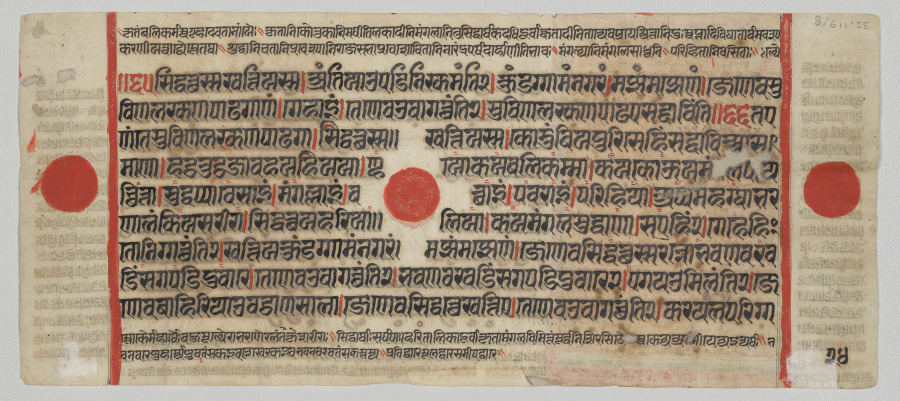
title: Text, folio 24 (verso), from a Kalpa-sutra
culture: Western India, Gujarat, last quarter of the 15th century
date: c. 1475–1500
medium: Gum tempera, ink, and gold on paper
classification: Painting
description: King Siddhartha is depicted on this page with his wife, Trishala, who had a series of auspicious dreams associated with her pregnancy. Her child Mahavira would grow up to become the historical founder of the Jain religion in the 500s BCE. The royal couple is resplendently enthroned and bedecked in jewelry. Queen Trishala’s bodice was painted with a green pigment made from copper and vinegar; its high acid content caused the paper itself to disintegrate. The lavish use of gold and lapis lazuli indicates that it was a costly production.